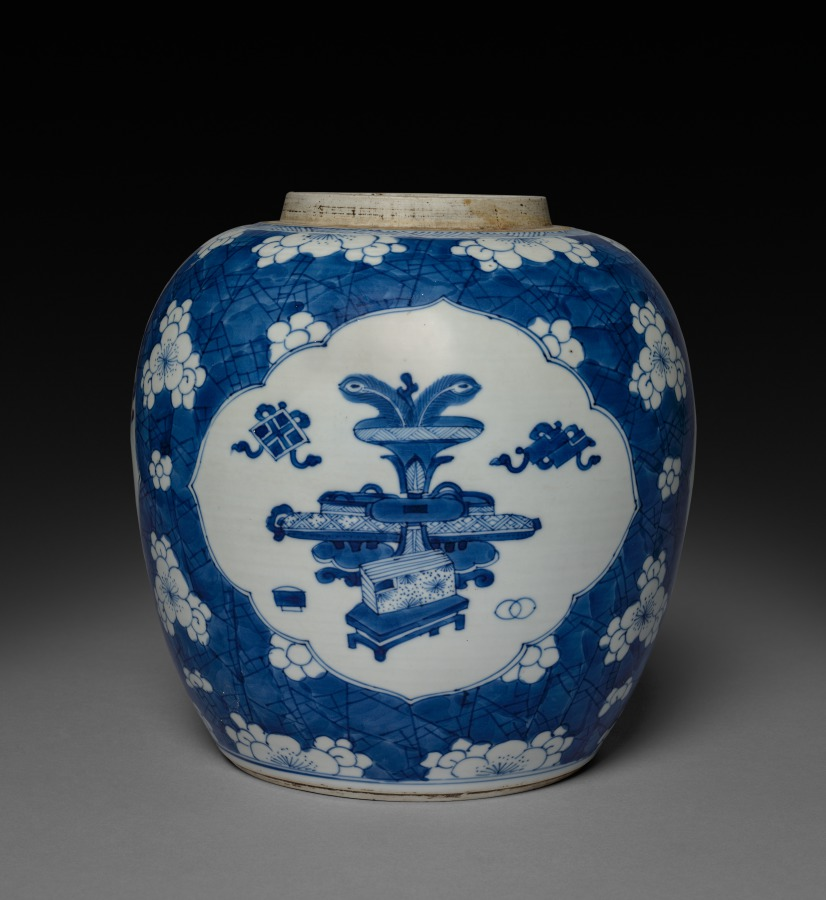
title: Ginger Jar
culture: China, Qing dynasty (1644-1911), Kangxi reign (1662-1722)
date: 1662–1722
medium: porcelain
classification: Ceramic